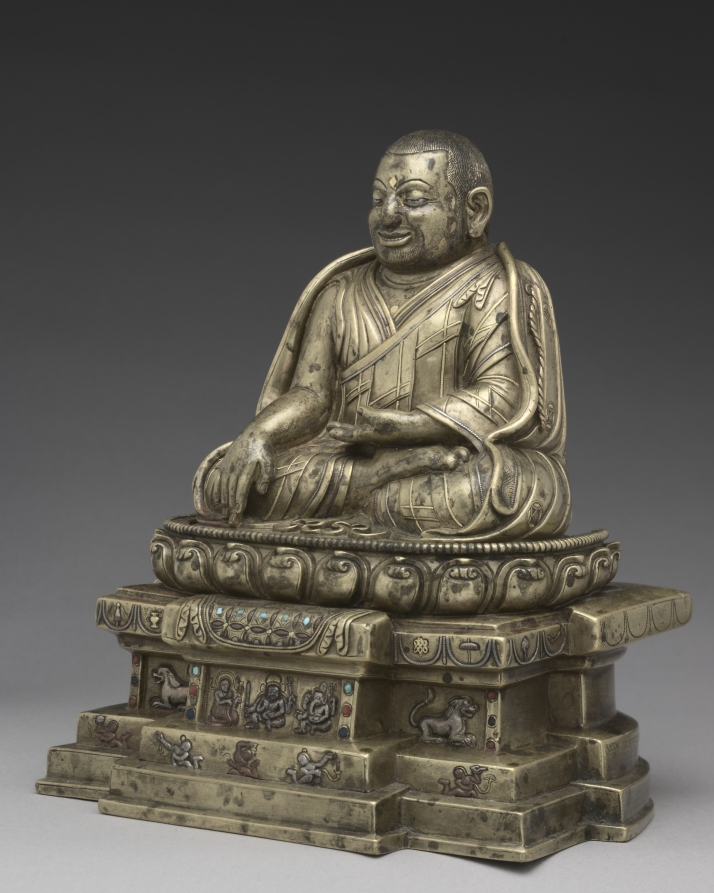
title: Portrait of Phagmo Drupa Dorje Gyalpo (1110–1170)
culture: Central Tibet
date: 1200s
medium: gilt bronze with gold, silver, copper, turquoise, lapis, and coral inlay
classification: Sculpture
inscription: / / Na mo 'ghu ru / / Ngan lam ban chung bdag gis ni / / bla ma Rin chen sku bzhengs pa yi / / bsod nams 'di yi byin brlabs kyis / / 'gro drug sdug sngal zad par shog / / Translation: "Salutations to the master ! May the sufferings of the six kinds of beings be appeased through the blessing of merit gained by me, the little monk of Ngan.lam, in having this statue of the Lama Rin.chen made."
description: This portrait statue depicts the first monastic leader of the prominent Buddhist monastery of Densatil, an influential early leader of the Tibetan Buddhist monastic order called Kagyu, famous for his views on the importance of meditation. He sits on a lotus pedestal and lion throne, like a Buddha, and his hand positions (mudras) communicate that meditation leads to enlightenment.